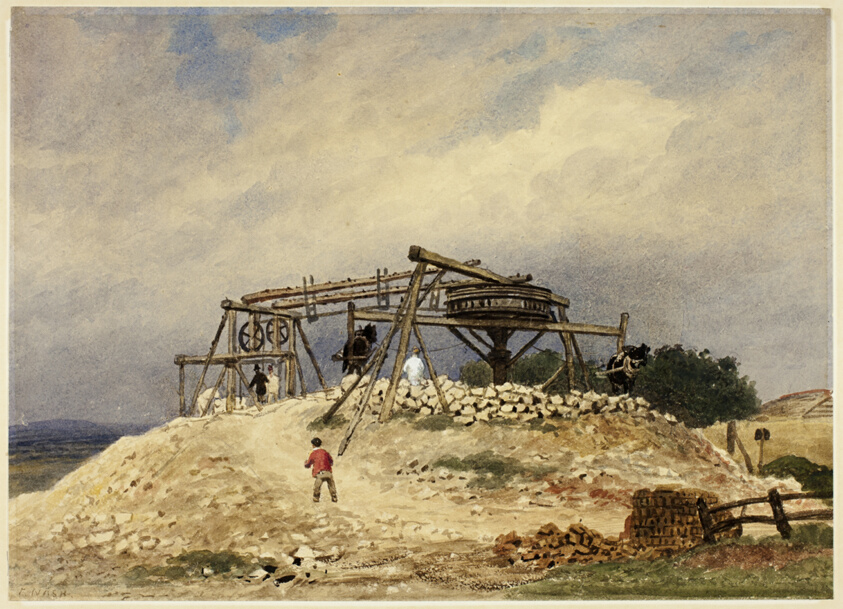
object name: Drawing and Watercolor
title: Top of Mineshaft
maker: Frederick Nash (English, 1782-1856)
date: c. 1815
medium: Watercolor with touches of gouache, over graphite, on cream wove paper, laid down on board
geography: England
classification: watercolor; drawings (visual works); prints and drawing